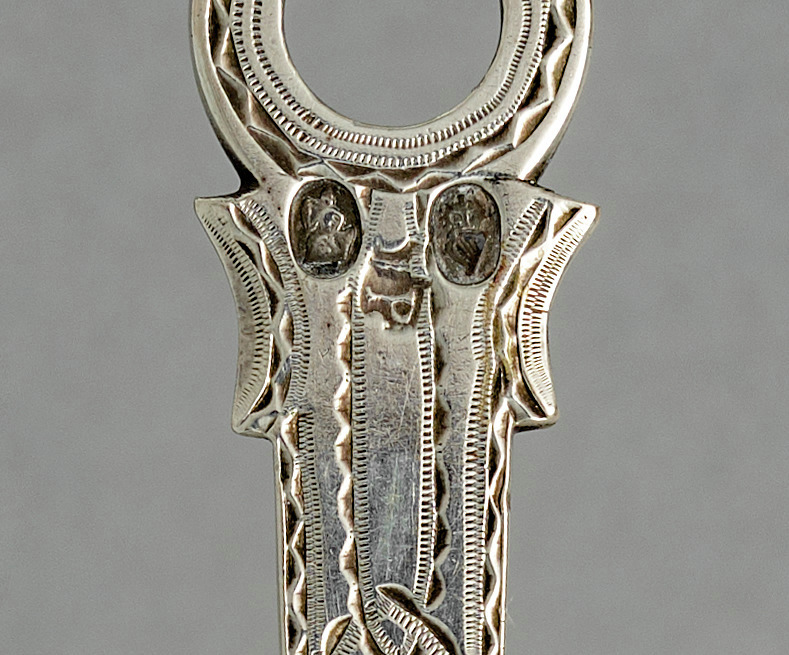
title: Skewer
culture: Ireland, Dublin, 18th century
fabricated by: John Power (Irish)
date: c. 1791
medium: silver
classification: Silver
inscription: engraved crest on one side.